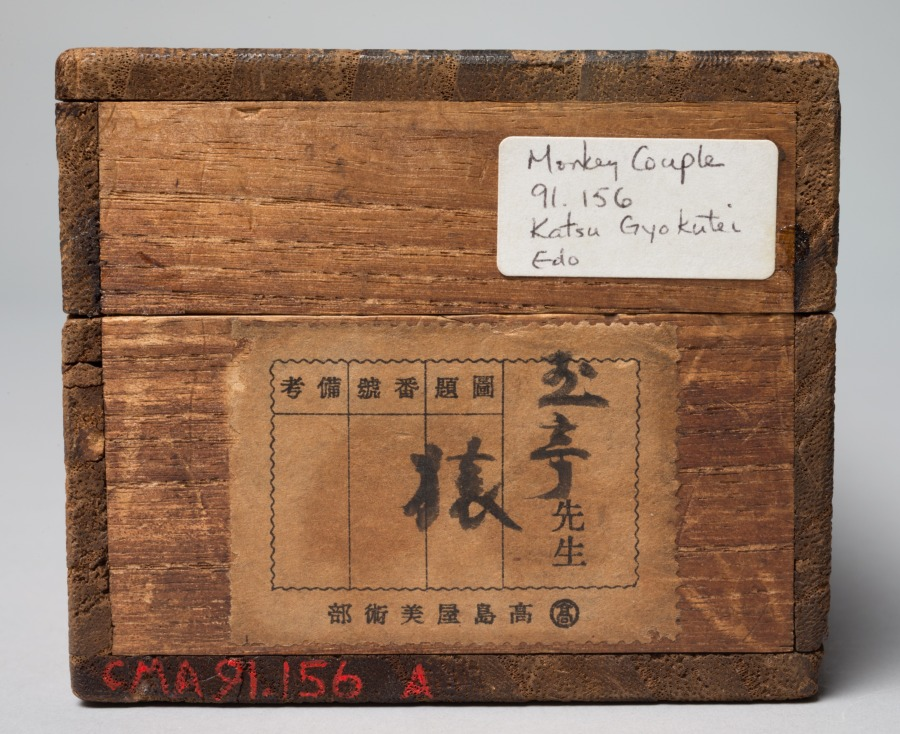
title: Monkeys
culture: Japan, Edo period (1615–1868)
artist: Gyokutei Katsu (Japanese)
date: c. 1800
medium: hanging scroll; ink on paper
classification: Painting